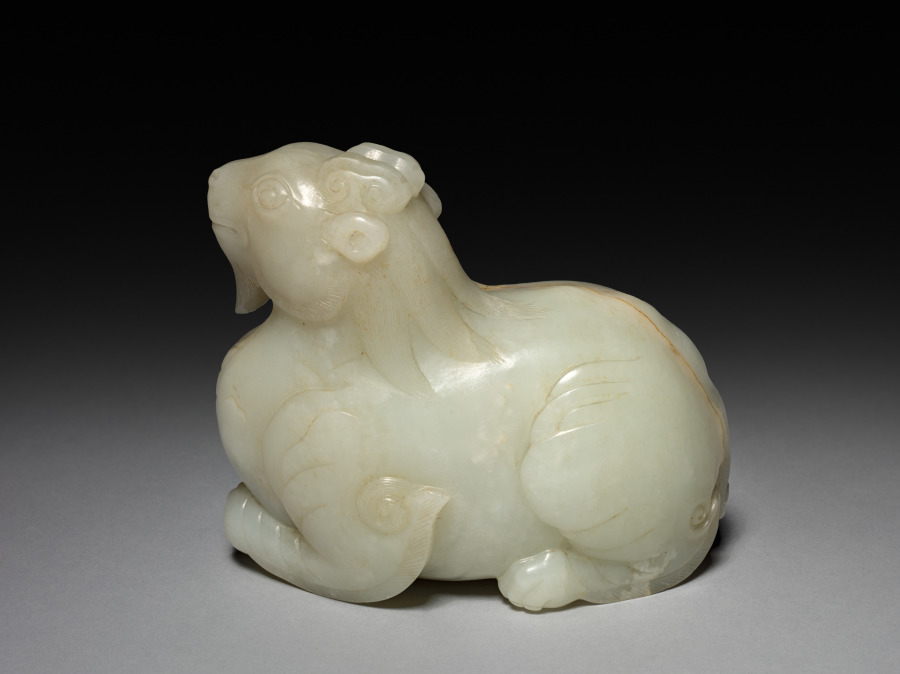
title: Fantastic Animal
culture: China, Qing dynasty (1644-1911)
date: 1700s–1800s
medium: jade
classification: Jade